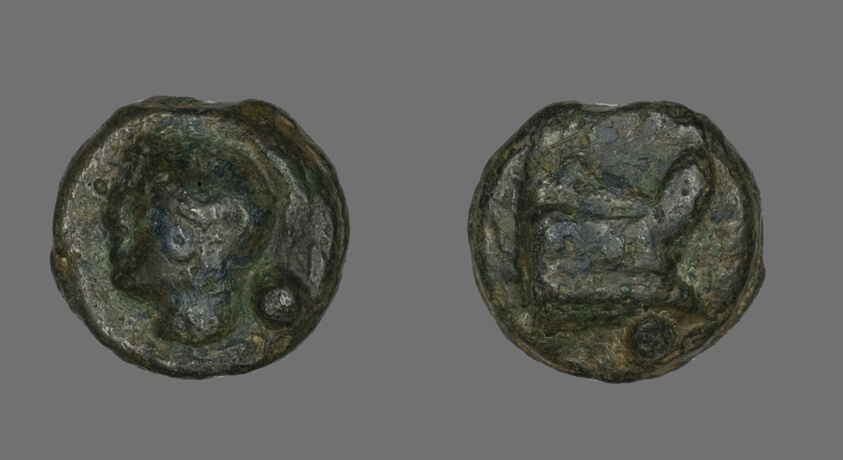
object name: Coin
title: Coin Depicting the Goddess Roma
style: republic period, ancient, roman (ancient, style or period)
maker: Roman, minted in Rome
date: 225-217 BCE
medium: Bronze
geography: Italy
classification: coin; ancient art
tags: goddesses, ships